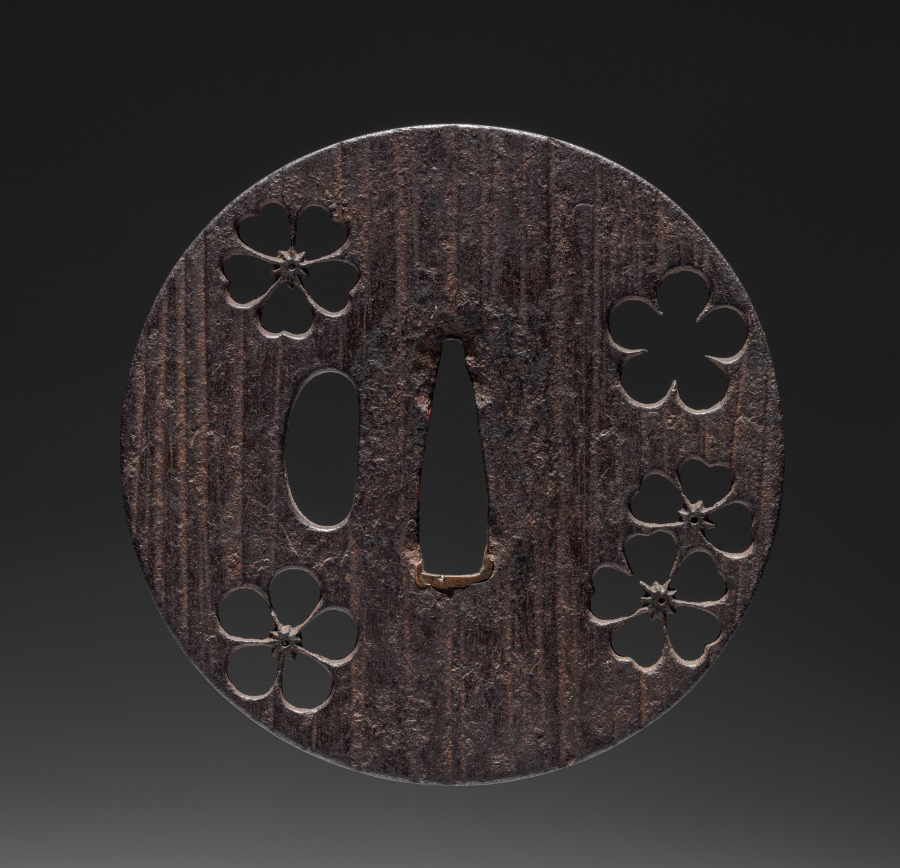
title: Sword Guard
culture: Japan, Edo period (1615–1868)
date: 1615–1868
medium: iron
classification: Arms and Armor